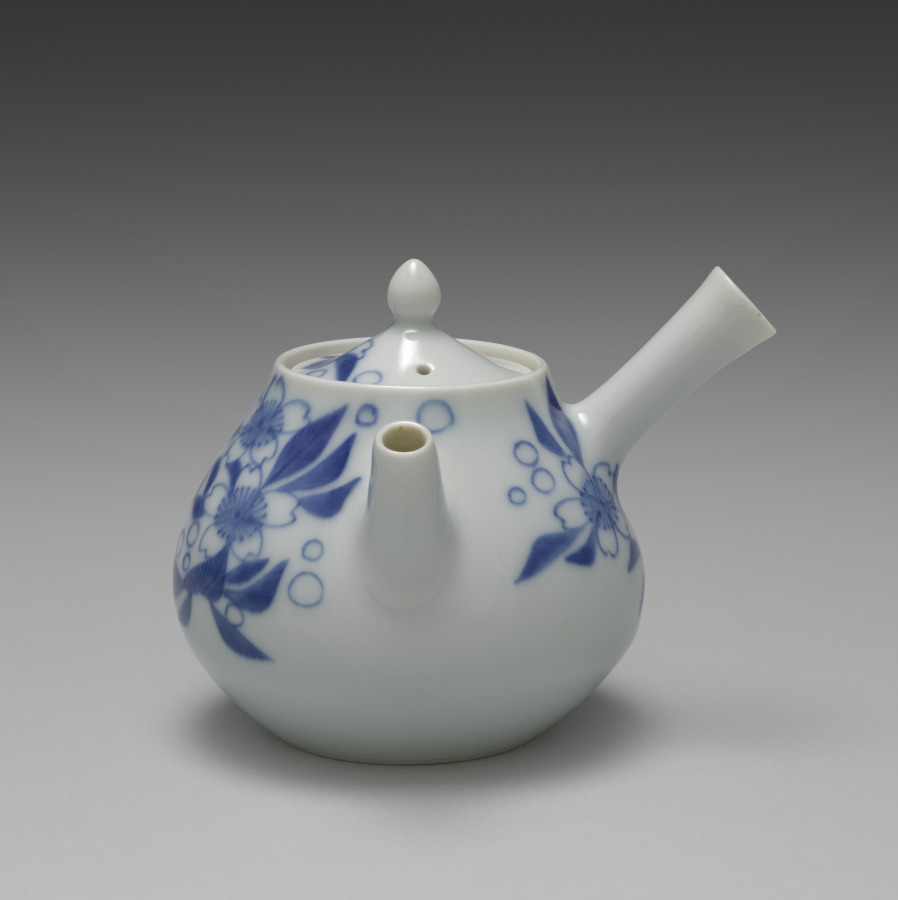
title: Teapot with Cherry Blossoms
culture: Japan, Taishō period (1912–26) or Shōwa period (1926–89)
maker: Seifū Yohei IV (Japanese, 1872–1951)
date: 1914–46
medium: Porcelain with underglaze blue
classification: Ceramic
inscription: 清風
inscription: 清風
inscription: 清風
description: This teapot with mountain cherry blossom motifs has its design in underglaze cobalt blue. It runs over both the pear-shaped body and the recessed lid, with its pointed, jewel-shaped handle. There is a faint bluish-green tint to the glaze. The mark impressed into the base of this work appears to be one used by Yohei III. However, the box inscription is brushed in a hand matching that of Yohei IV, and while the seal on the lid is one often used by Yohei III, that next to the signature on the back of the lid is one generally used by Yohei IV. The signature, too, resembles others belonging to Yohei IV. As the design, technique, and object named on the box accurately describe the contents, it seems unlikely, but not impossible, that it is mismatched. There are many cases in which Yohei III works are contained in boxes with inscriptions, seals, and a signature by Yohei IV. However, in such examples, Yohei IV clearly identifies himself as authenticating the work of his father and often includes his father’s Imperial Household Artist seal. This may be an example of a transitional piece in which Yohei IV has used his father’s mark on the base of his own work.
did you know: Cherry blossoms mark the arrival of spring, and their short-lived beauty is deeply anticipated and appreciated.